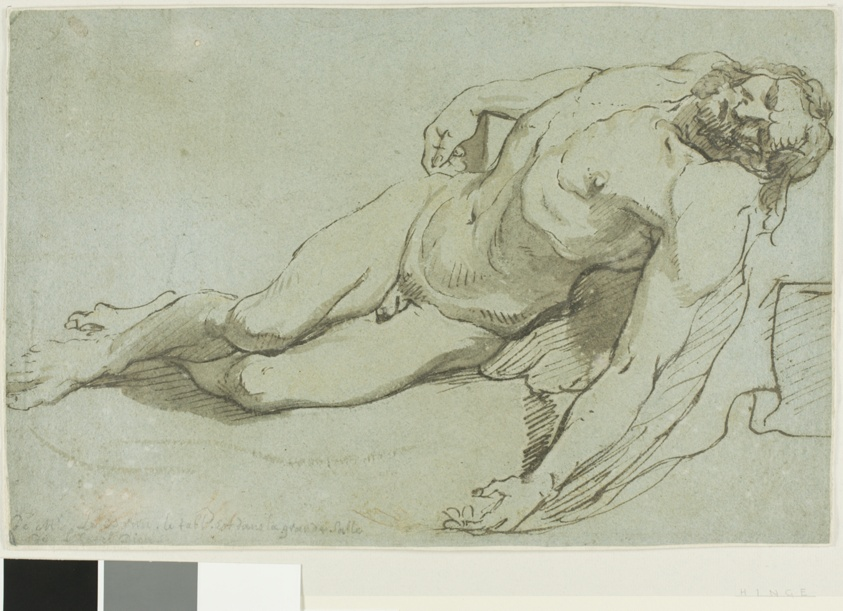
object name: Drawing and Watercolor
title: The Dead Christ (recto); Child's Head (verso)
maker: Recto by Charles Le Brun (French, 1619-1690); Verso by Unknown Artist (French, 18th century)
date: 1646 (recto); 18th century (verso)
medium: Pen and brown ink, with brush and brown and gray wash, and traces of red chalk, heightened with lead white (discolored), on blue laid paper, tipped on cream laid paper (recto), and red chalk transfer on cream laid paper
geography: France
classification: drawings (visual works); prints and drawing